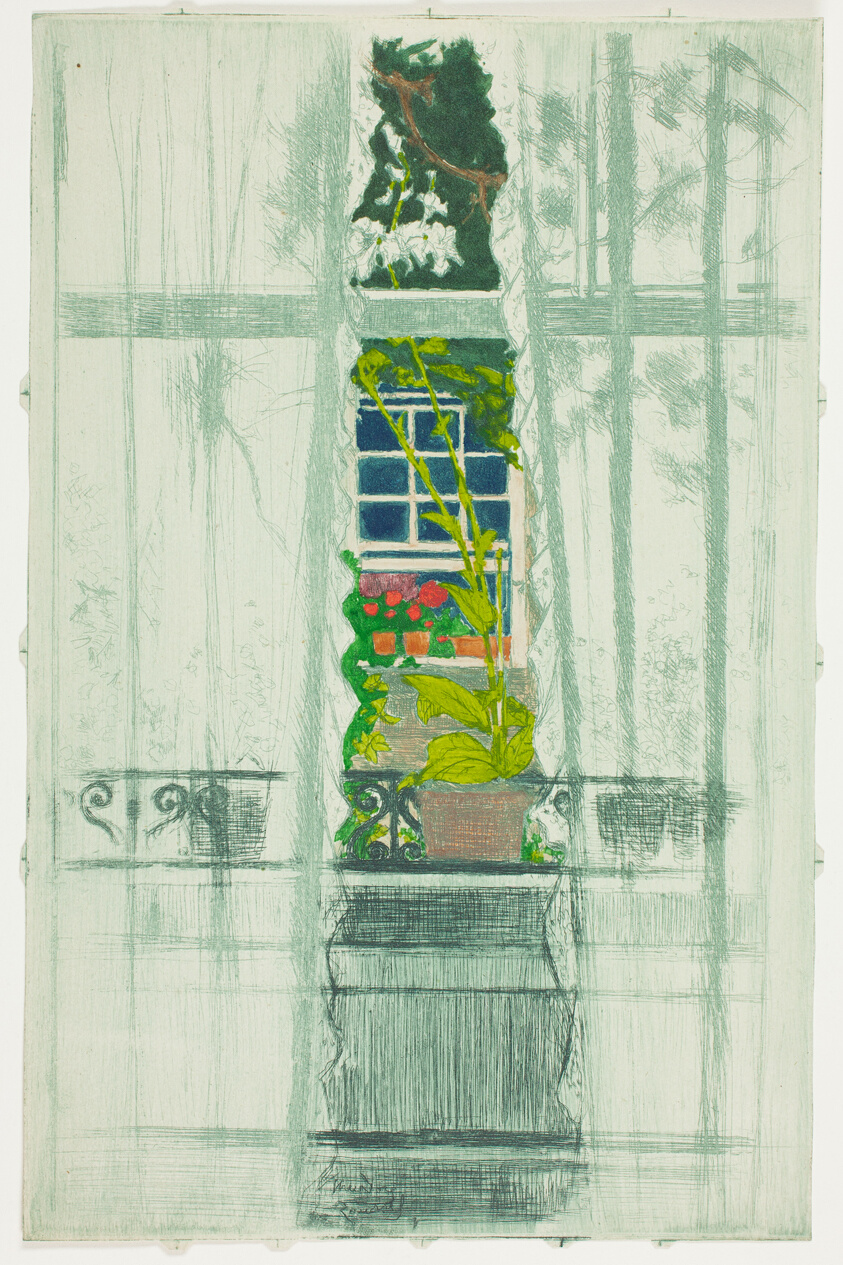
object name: Print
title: A Window Seen Through a Window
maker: Theodore Roussel (French, worked in England, 1847-1926)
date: 1897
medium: Color etching and aquatint, inked à la poupée, on cream laid paper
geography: England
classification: etching; aquatint; paper; print; prints and drawing